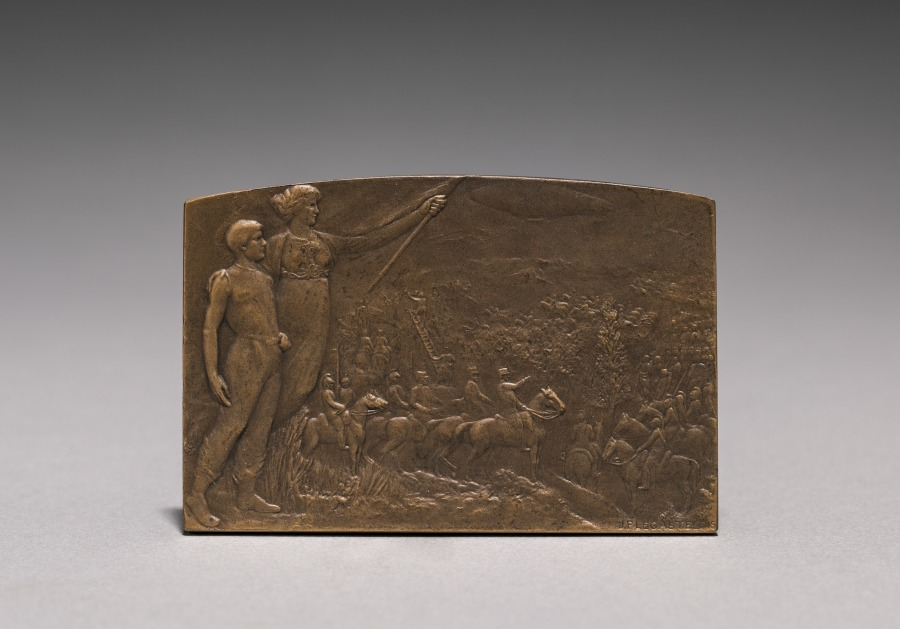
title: Medal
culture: France, 19th century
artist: Jules Prosper Legastelois (French, 1855–1931)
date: c. 1914–18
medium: bronze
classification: Metalwork